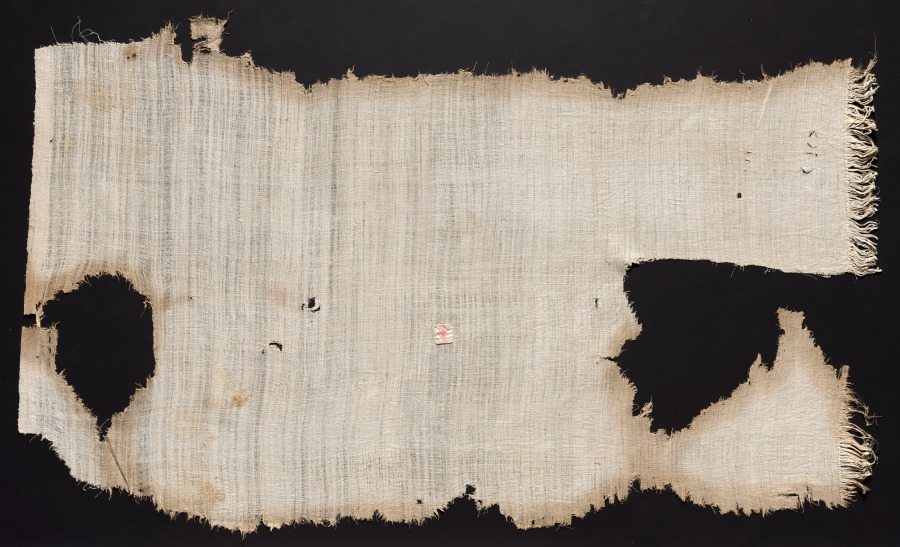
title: Mummy Linen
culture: Egypt, New Kingdom (1540–1069 BCE), Dynasty 18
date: 1540–1296 BCE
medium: plain weave: linen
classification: Textile